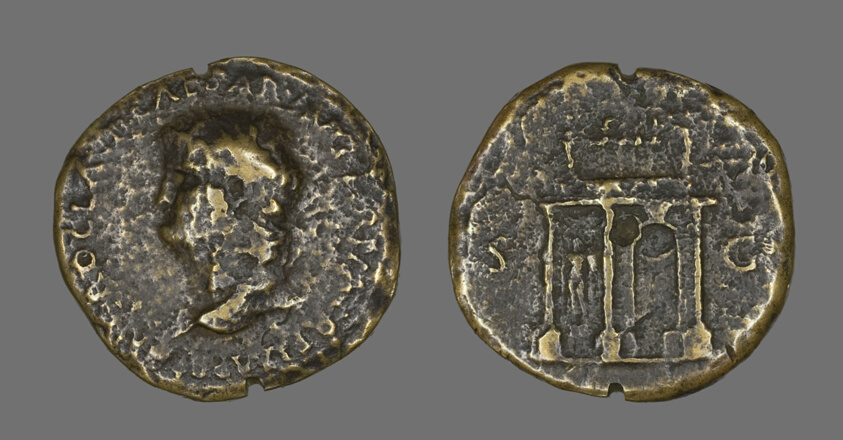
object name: Coin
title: Sestertius (Coin) Portraying Emperor Nero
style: imperial (roman), ancient, roman (ancient, style or period)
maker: Roman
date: 54-69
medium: Bronze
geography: Roman Empire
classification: coin; ancient art